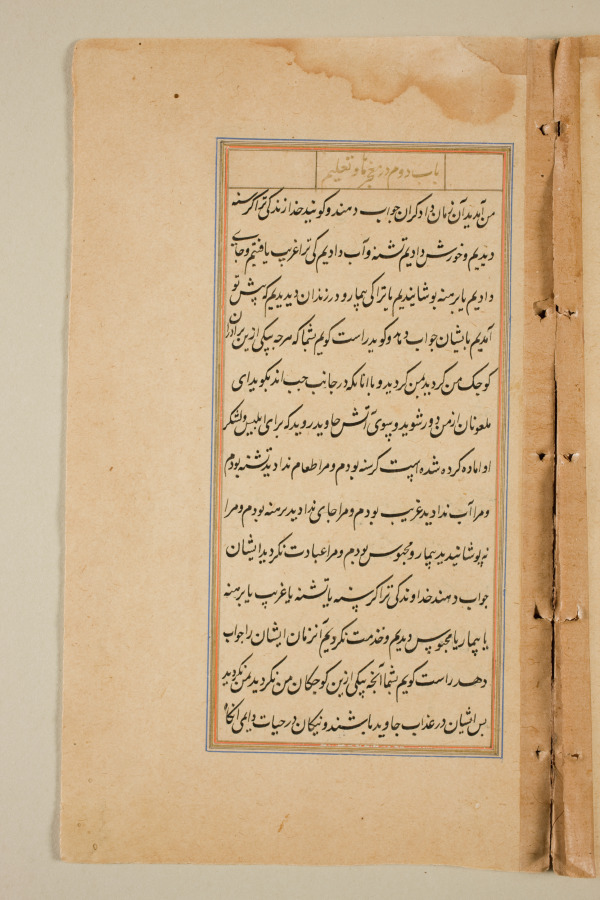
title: Text page from a Mirror of Holiness (Mir’at al-quds) of Father Jerome Xavier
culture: Mughal India, Allahabad, made for Prince Salim (1569–1627)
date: 1602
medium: Ink and gold on paper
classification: Manuscript